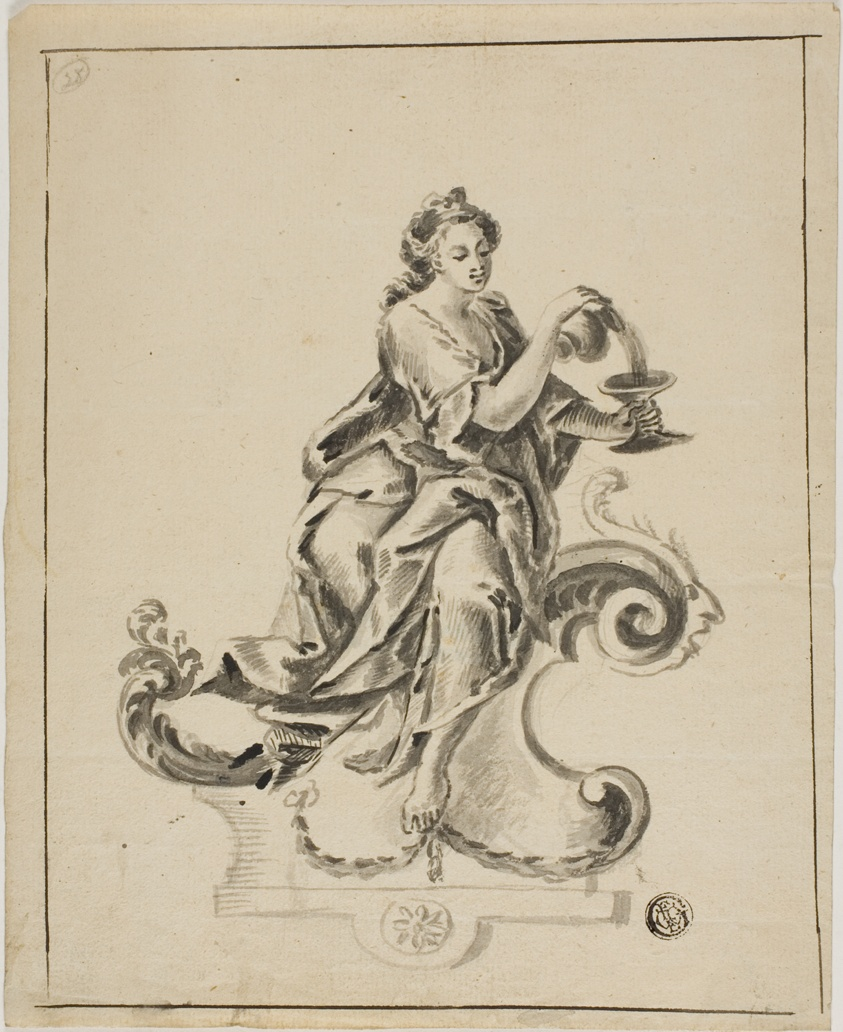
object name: Drawing and Watercolor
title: Woman Seated on Rococo Scroll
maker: Unknown Artist; Italian, 1700-1799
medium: Brush and black and gray wash, over touches of graphite, on cream laid paper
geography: Italy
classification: ink or chalk wash; drawings (visual works); prints and drawing